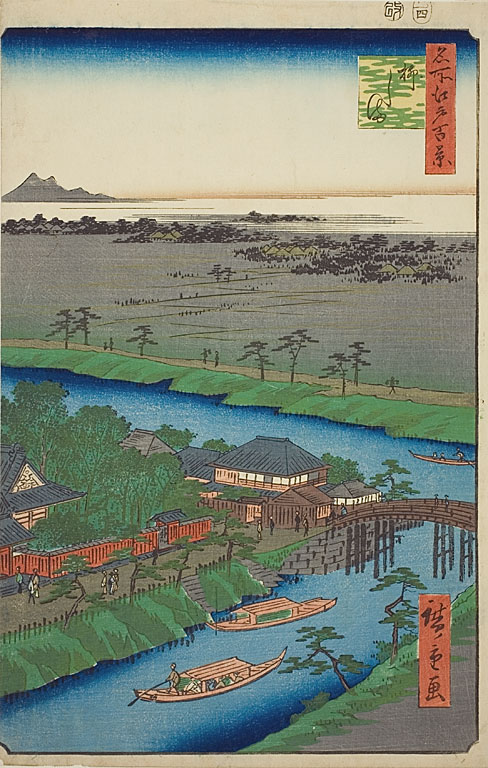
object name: Print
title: Yanagishima, No.32 from the series "One Hundred Famous Views of Edo (Meisho Edo hyakkei)"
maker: Utagawa Hiroshige (Japanese, 1797-1858)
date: 1857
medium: Color woodblock print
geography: Japan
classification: woodblock print; print; asian art